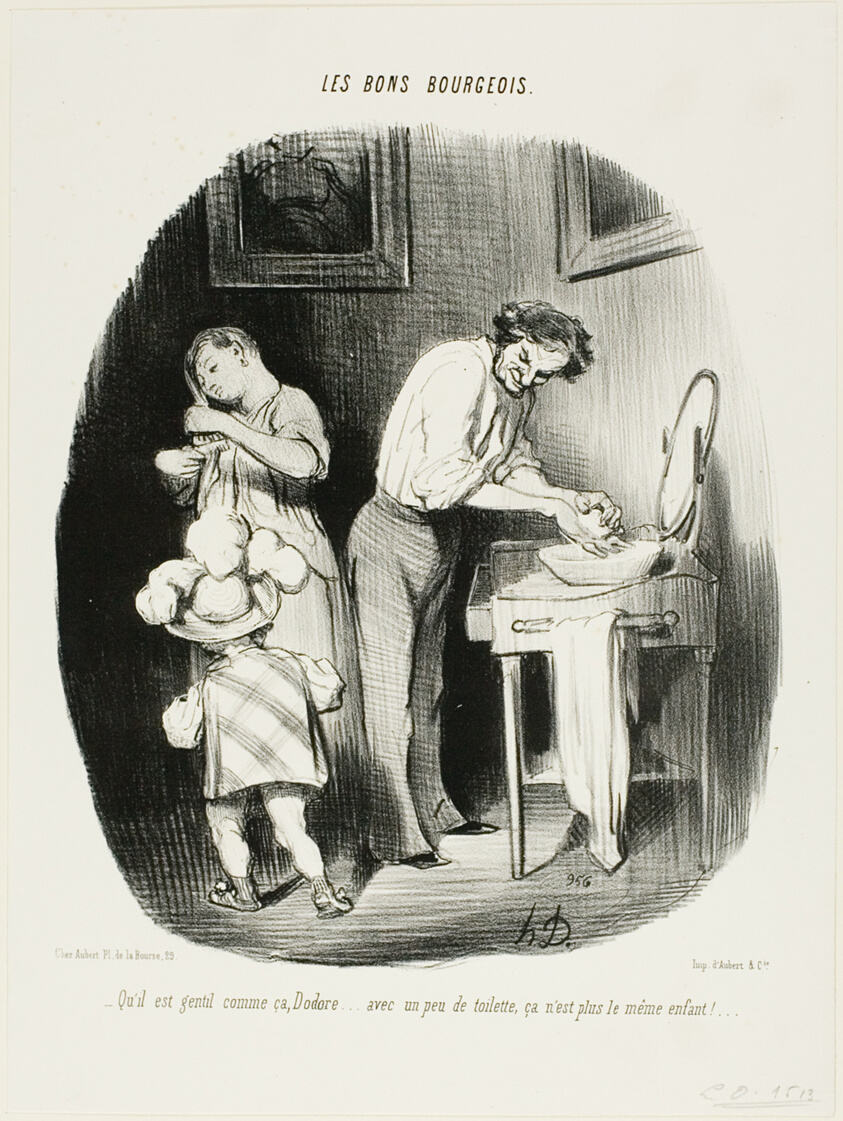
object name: Print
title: “- Isn't he cute like that, Dodore... with a little bit of cleaning up, he is just not the same child any more!...,” plate 37 from Les Bons Bourgeois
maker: Honoré Victorin Daumier; French, 1808-1879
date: 1847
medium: Lithograph in black on white wove paper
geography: France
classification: lithograph; print; prints and drawing